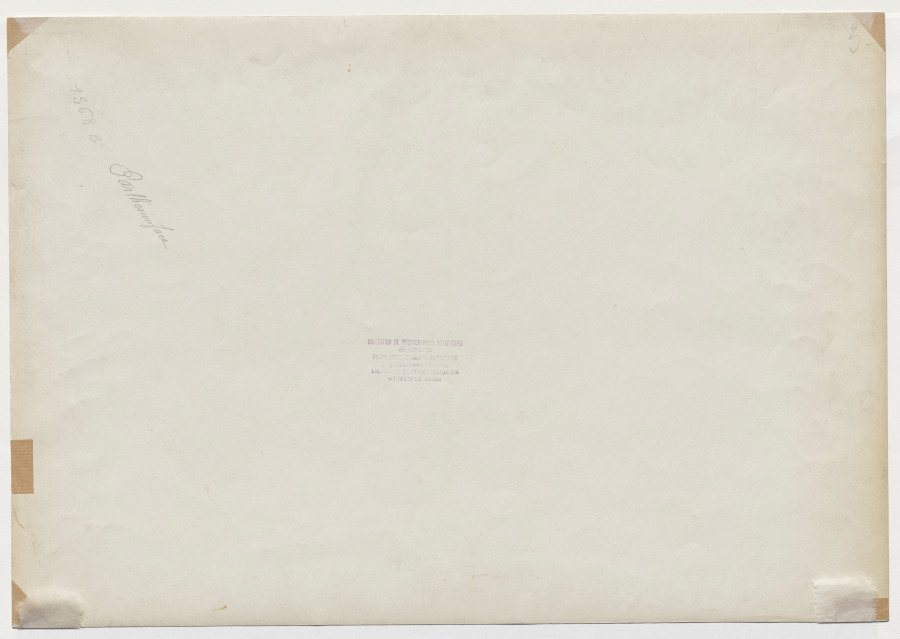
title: The Parthenon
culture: France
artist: Frédéric Boissonnas (Swiss, 1858–1944)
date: c. 1907–20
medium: mammoth carbon print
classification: Photograph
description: Originally dedicated to the ancient Greek goddess Athena, this building—which still stands today—was completed in 438 B.C. Frédéric Boissonas was a Swiss photographer who amassed enough images on several trips to Greece to publish 14 photo albums on its landscape and archeological sites. The Greek government used his images to attract tourists and raise the country’s image abroad.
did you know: In the early Middle Ages, this Greek temple became a church and in the 1400s, a mosque.